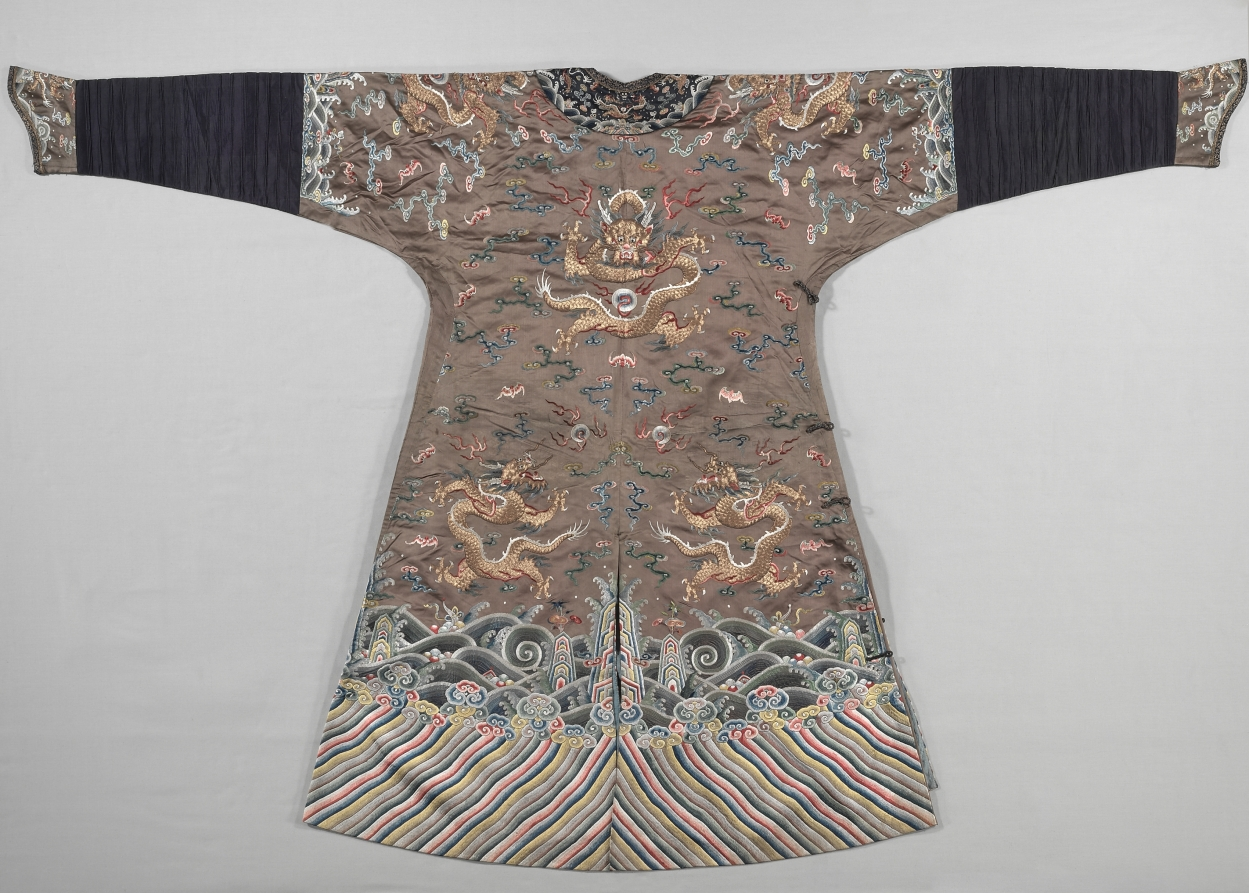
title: Mandarin Coat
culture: China, Qing dynasty (1644–1911)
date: late 1700s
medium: embroidery, silk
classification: Garment